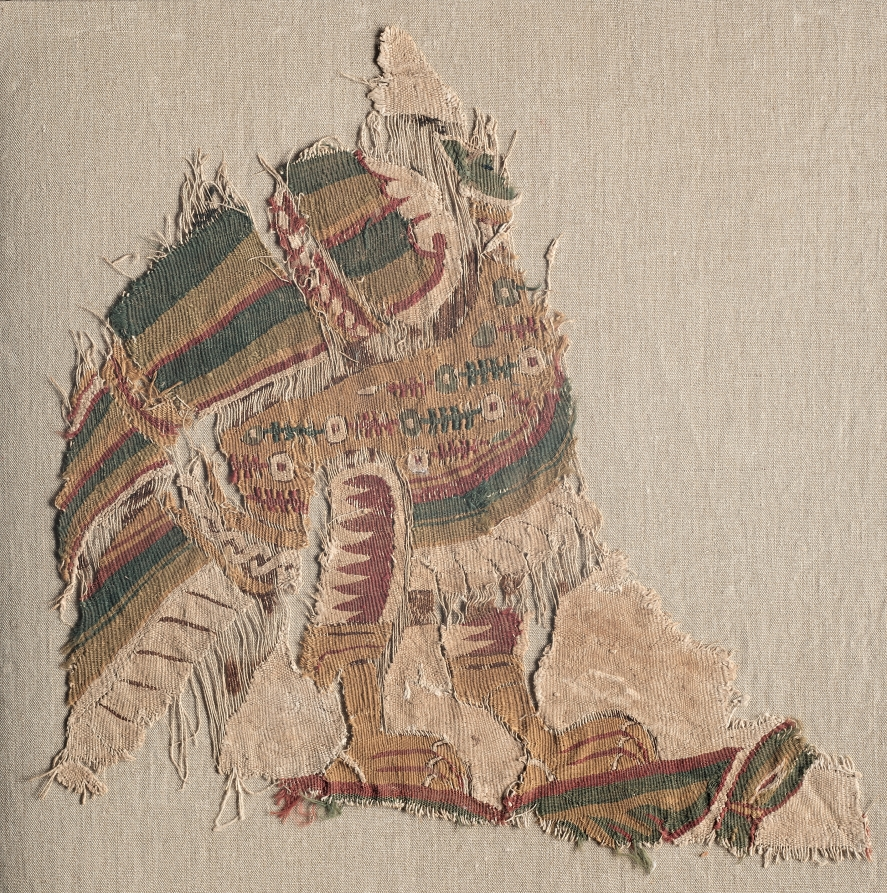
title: Tapestry with beheaded bird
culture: Egypt, al-Bahnasa, Tulunid period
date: 800s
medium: tapestry weave: linen and wool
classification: Tapestry